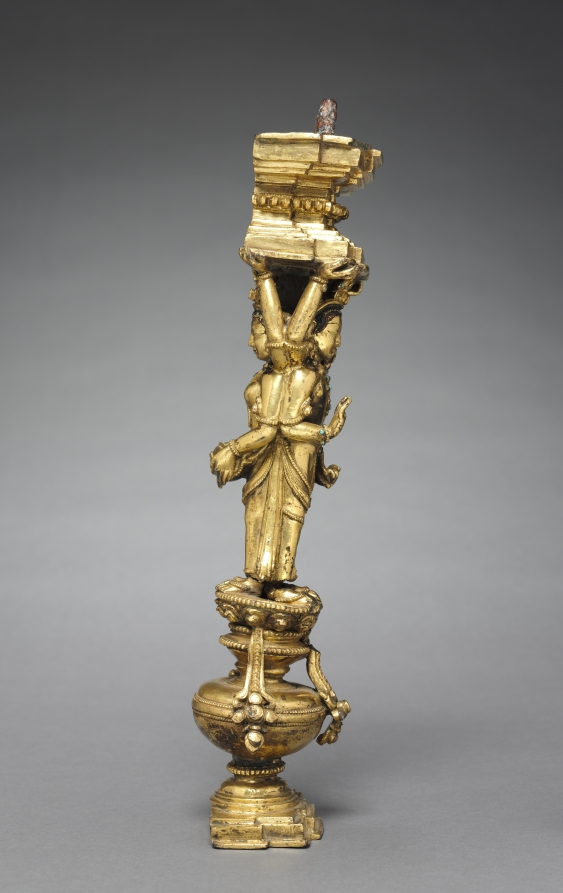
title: Support with Addorsed Figures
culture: Tibet, Densatil Monastery, 15th century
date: 1400s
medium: gilt bronze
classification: Sculpture